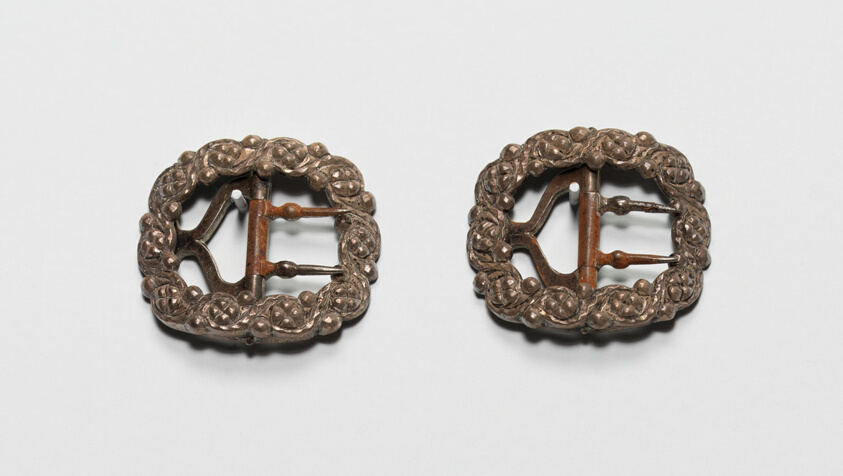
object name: Metalwork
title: Pair of Buckles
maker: England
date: Late 18th century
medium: Silver and steel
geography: England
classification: buckle (strap accessory); costume accessory; european decorative arts; metalwork